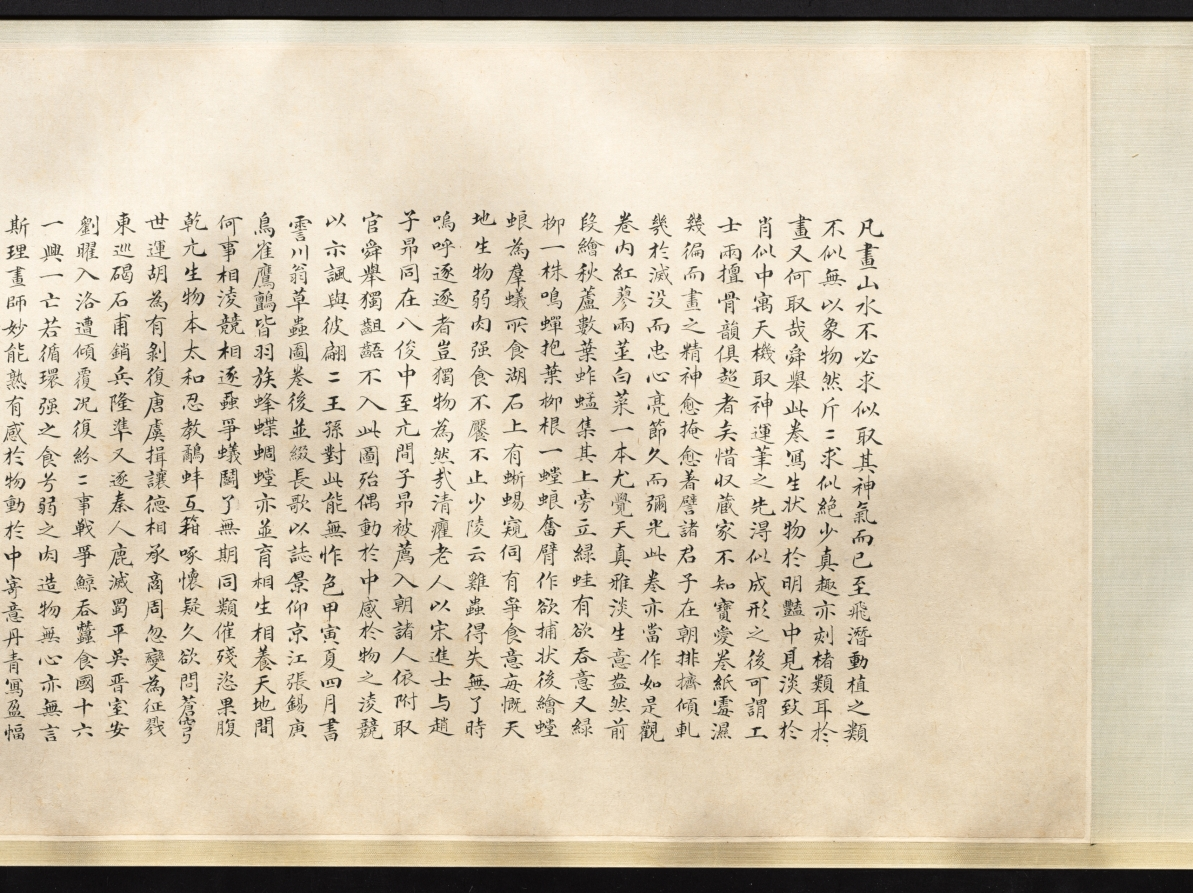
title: Insects and Flowers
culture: China, Qing dynasty (1644-1911) or Republican period (1912-49)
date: c. 1900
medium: Handscroll, ink and color on paper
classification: Painting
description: More than 26 feet long, this scroll presents insects, reptiles, and plants in delicate brushwork and pale colors, referring in style to earlier Southern Song dynasty (1127–1279) bird-and-flower paintings. Upon closer inspection, ants dismember a butterfly and reptiles wait to ambush their prey. An inscription at the end of the painting gives us an idea of its meaning: Attributed to the Qing dynasty scholar Zhang Xigeng (張錫庚, 1801–1861), the inscriber relates the work to an earlier painting by Qian Xuan (錢選, c. 1235–before 1307) and further suggests that the painting may allude to the relentlessness of natural selection. By drawing a parallel to tumultuous episodes in Chinese history, the writer might even hint at the domestic rebellions and the aggression of Western powers against China in his lifetime, particularly the Opium Wars (1839–60).